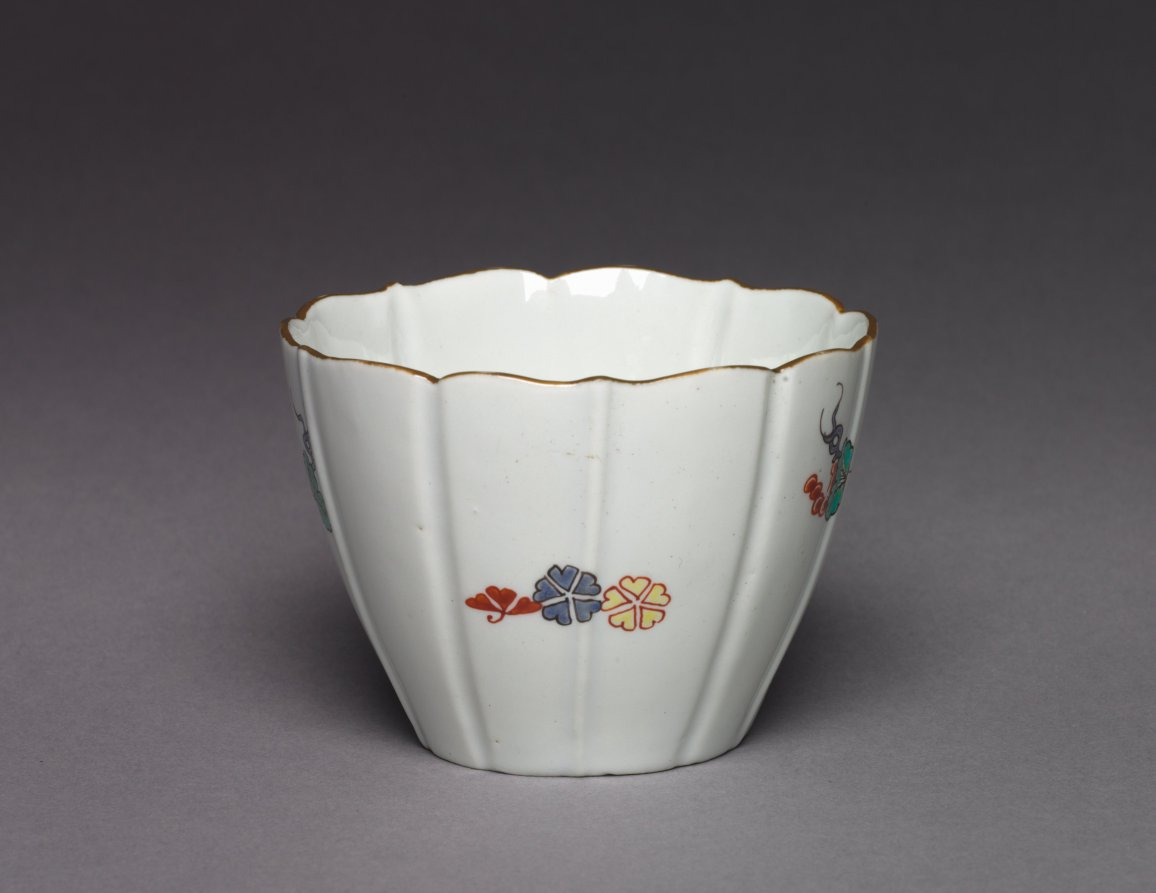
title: Tea Cup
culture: France, Chantilly, 18th century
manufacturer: Chantilly Porcelain Factory (French)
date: c. 1730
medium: soft-paste porcelain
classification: Ceramic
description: The pieces composing this individual tea set are entirely typical of Chantilly soft-paste porcelain in the Kakiemon style. Both the form and decoration of these pieces were inspired by Japanese prototypes. The use of knobs in the form of trumpet-shaped blossoms is characteristic of Chantilly wares.